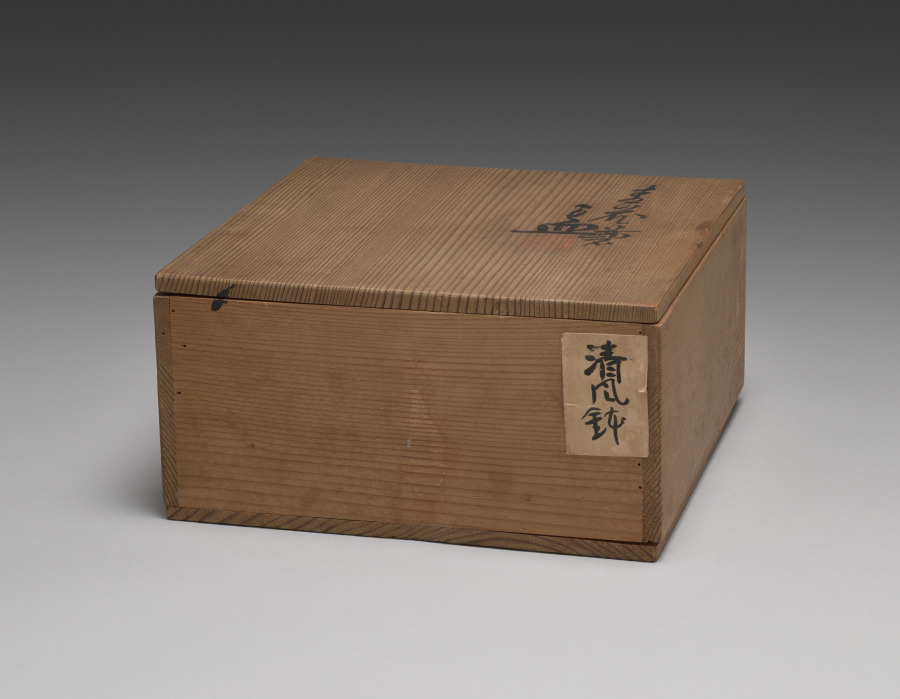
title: Dining Bowl with Clematis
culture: Japan, Meiji period (1868–1912)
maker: Seifū Yohei III (Japanese, 1851–1914)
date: 1893–97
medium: Porcelain with underglaze and overglaze colors, molded and incised designs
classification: Ceramic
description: The bowl is an especially well-executed example of Yohei III’s work in underglaze blue combined with other underglaze colors. This low-profile dining bowl has paintings of flowering clematis vines under the glaze in blue and red. Water is depicted with blue in the bottom of the bowl. The lines of white used to show motion on the water’s surface were created using either a reserve technique, where blue was omitted, or a masking technique, where parts of the surface were covered before applying the blue. A pair of butterflies flutters across one side. The foot is decorated with a pattern of spirals in blue, and the lip curves in slightly. The overall effect is one of seeing the flowering vine hanging down, hovering just above the surface of a pond, whose slight disturbances hint at unseen fish swimming below.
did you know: This bowl shows an environment painted in the round.